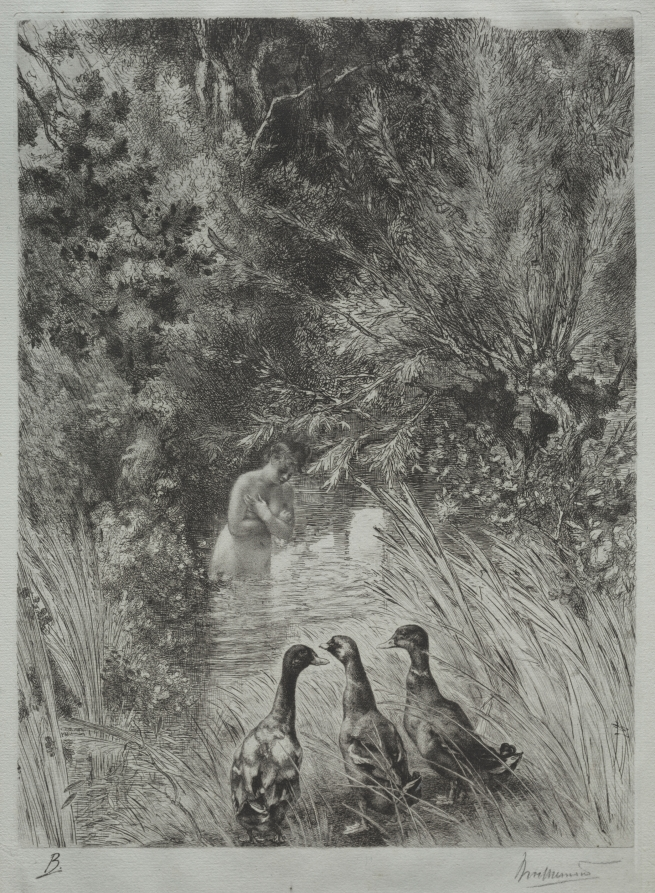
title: The Surprised Ducks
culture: France, 19th century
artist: Félix Bracquemond (French, 1833–1914)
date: 1882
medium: etching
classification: Print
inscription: signed, lower right, in graphite: Bracquemond; lower left, in plate: B.